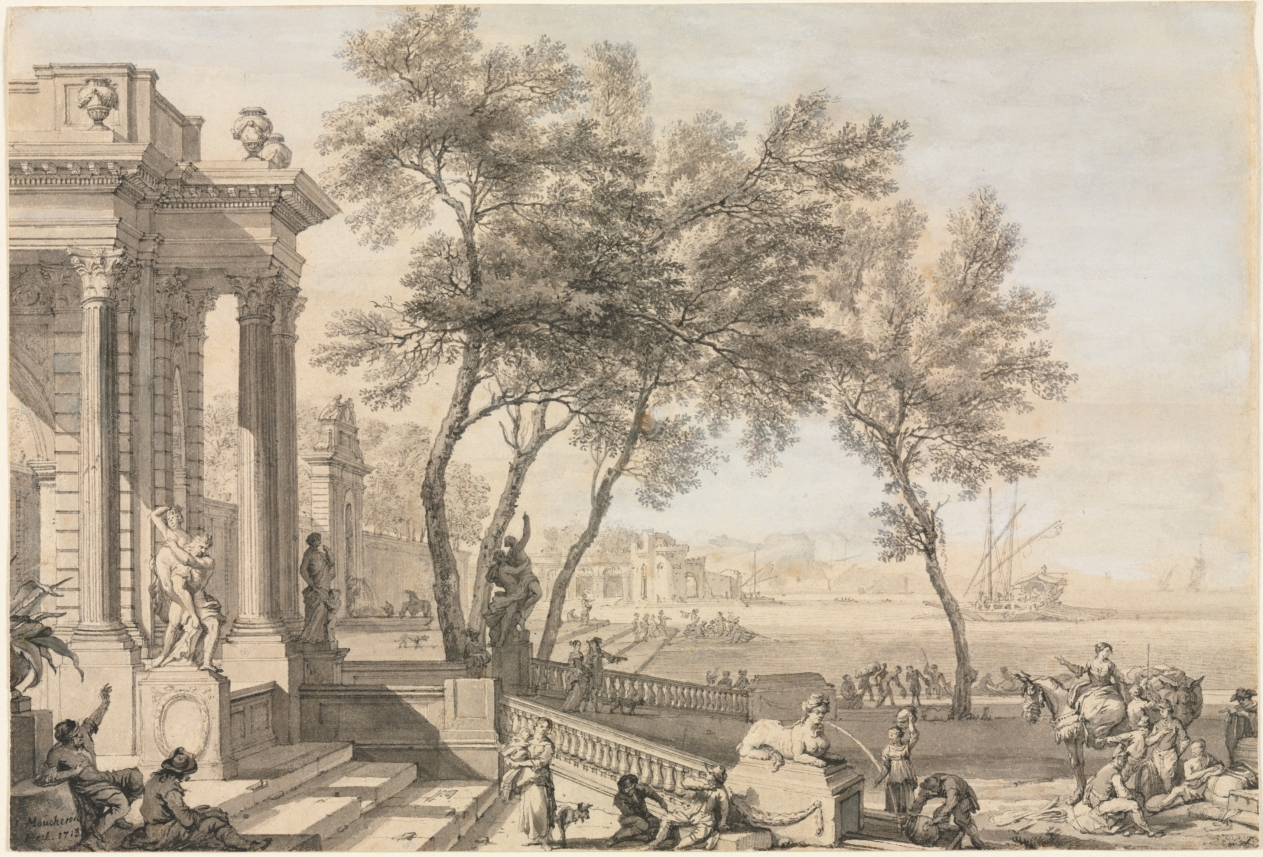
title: Fantastic Harbor Scene with Architecture and Figures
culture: Netherlands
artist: Isaac de Moucheron (Dutch, 1667–1744)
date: 1713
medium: pen and black ink and brush and gray wash with traces of blue gouache, heightened with white gouache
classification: Drawing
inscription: signed, lower left, in black ink: [I ?] Moucheron / Fecit. 1713 ; VERSO, upper center, in graphite: Moucheron Isaac / 1670- 1744